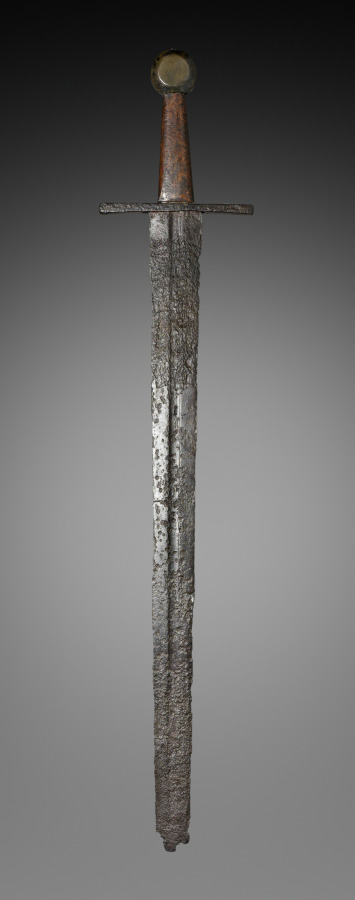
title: Sword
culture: Germany(?)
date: c. 1350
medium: iron; wood grip and brass pommel replacements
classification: Arms and Armor